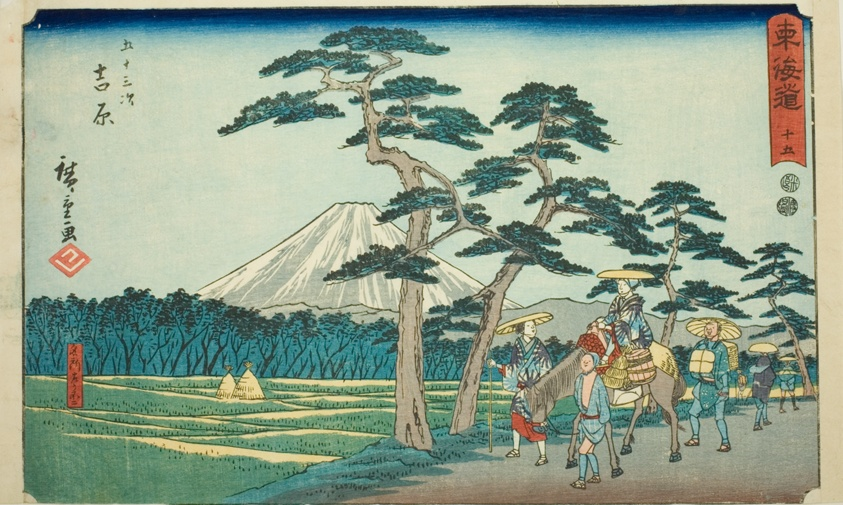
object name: Print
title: Yoshiwara: The Famous Sight of Mount Fuji on the Left (Yoshiwara, meisho hidari Fuji)—No. 15, from the series "Fifty-three Stations of the Tokaido (Tokaido gojusan tsugi)," also known as the Reisho Tokaido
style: Japanese (culture or style)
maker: Utagawa Hiroshige 歌川 広重; Japanese, 1797-1858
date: c. 1847/52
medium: Color woodblock print; oban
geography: Japan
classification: woodblock print; print; asian art